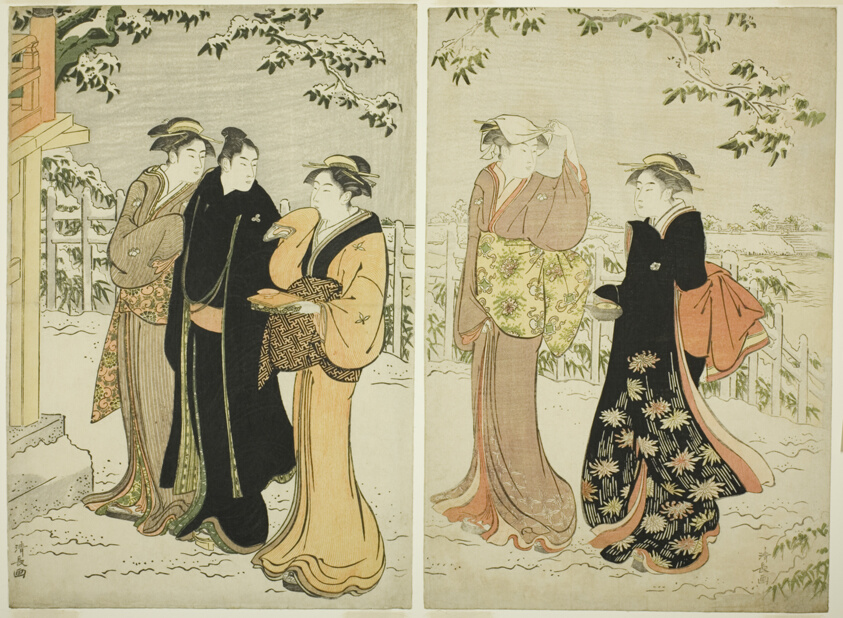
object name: Print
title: Matsuchi Hill after Snowfall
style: Japanese (culture or style)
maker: Torii Kiyonaga (Japanese, 1752-1815)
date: c. 1785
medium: Color woodblock print; oban diptych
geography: Japan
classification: woodblock print; print